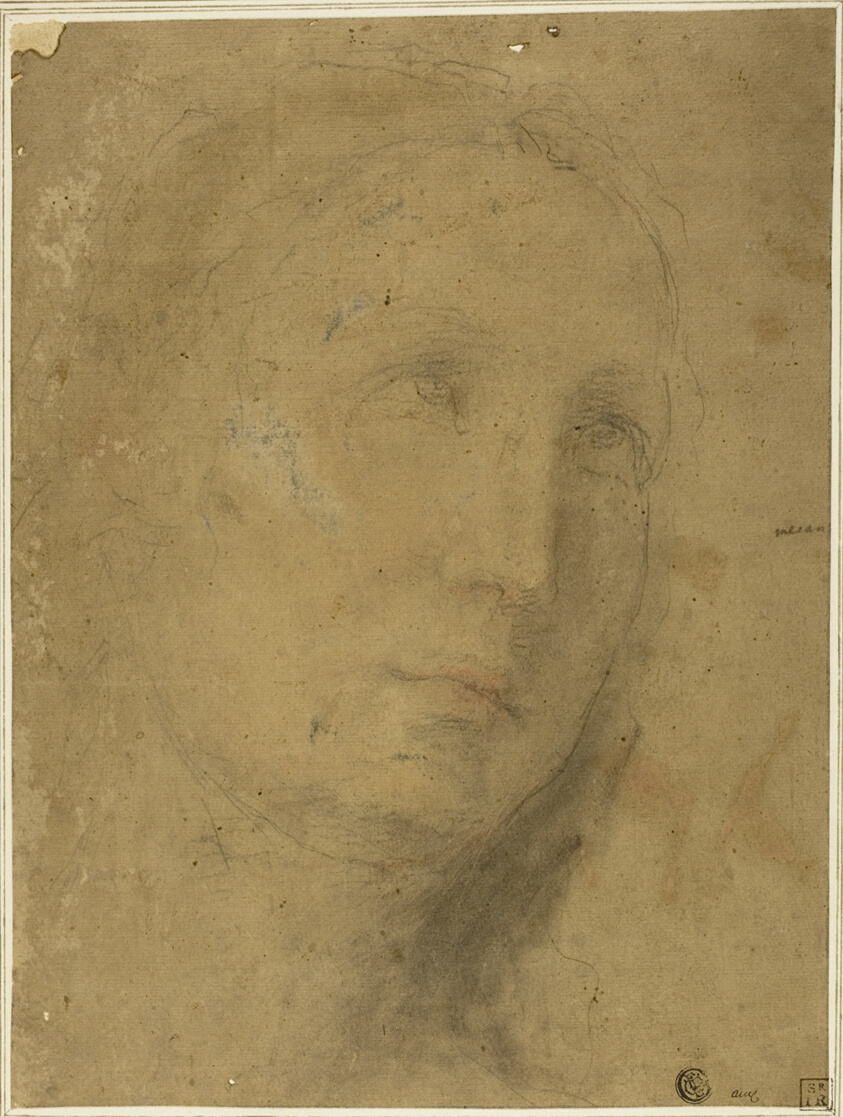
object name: Drawing and Watercolor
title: Head Looking Upwards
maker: Unknown Artist; Italian, late 16th Century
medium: Red and black chalk, heightened with lead white (partially oxidized), on tan laid paper, laid down on ivory laid paper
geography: Italy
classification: chalk; drawings (visual works); prints and drawing